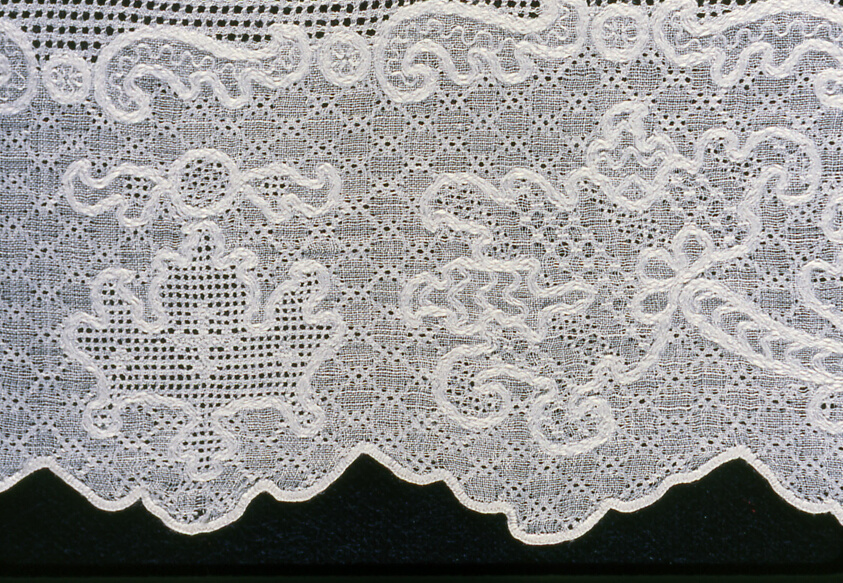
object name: Textile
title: Border (From a Cover)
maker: Southern Italy or Sicily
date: Probably 1675/1700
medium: Linen, plain weave; embroidered with linen yarns; pulled threadwork, embroidered in Antwerp edge, crossed back, four-sided, Greek cross filling, interlocking lace, running, satin, and single faggot stitches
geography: Italy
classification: textile; needlework (visual works)